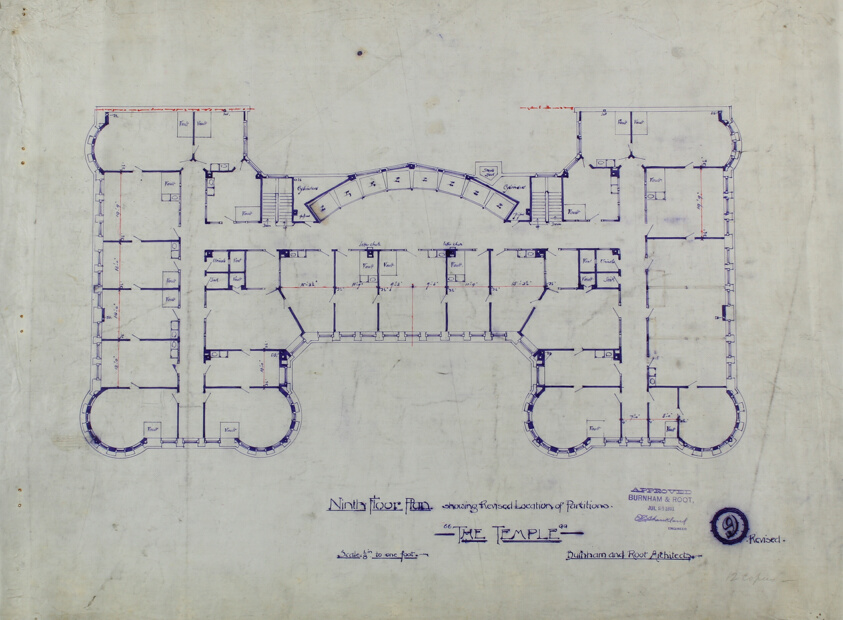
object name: Architectural Drawing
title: Women's Temple Building, Chicago, Illinois, Ninth Floor Plan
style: 19th century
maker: Burnham and Root (American, 1873-1892); Daniel Hudson Burnham (American, 1846-1912); John Wellborn Root (American, 1850-1891); E.C. Shankland (American, early 20th cen.)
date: July 23, 1891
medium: Purple and red hectograph ink on linen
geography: LaSalle Street, 102-116 South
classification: architectural drawing; architecture; design; plan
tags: temple, architecture, Chicago, women, design, Floor plans, illinois